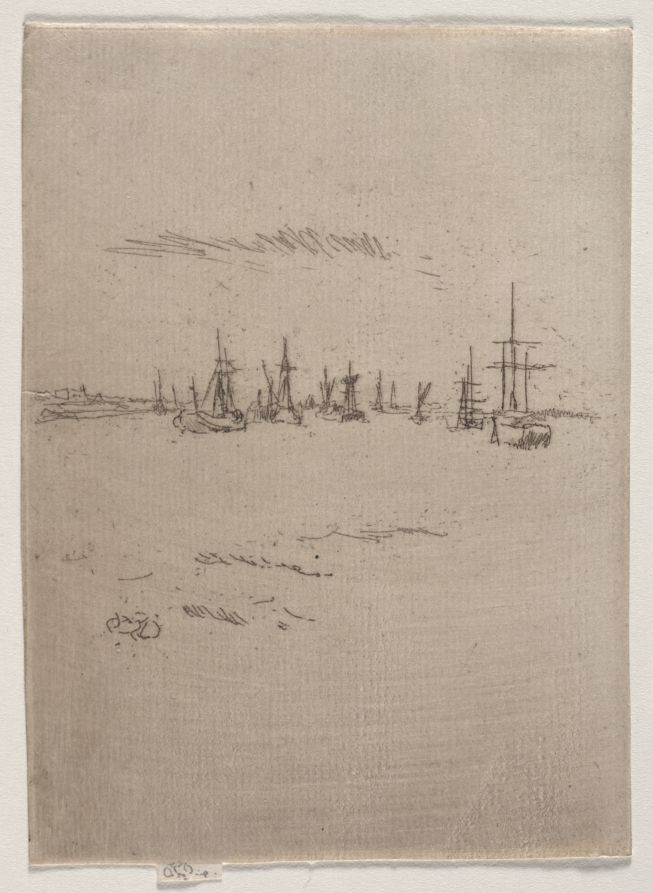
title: Return to Tilbury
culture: America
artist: James McNeill Whistler (American, 1834–1903)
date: 1887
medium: etching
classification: Print